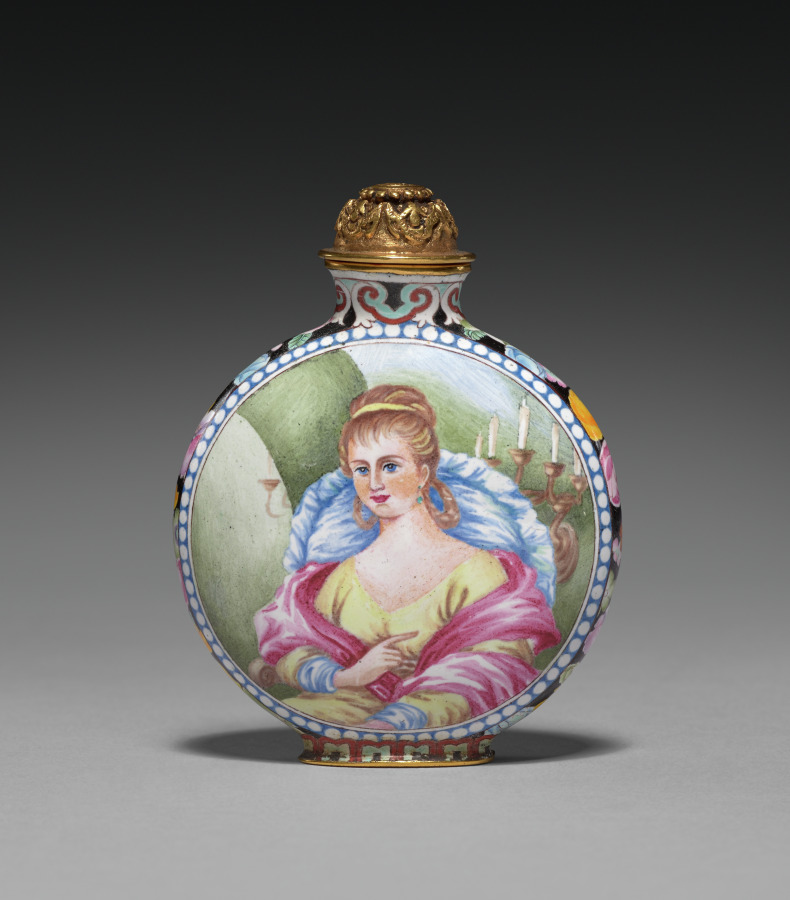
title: Snuff Bottle with European Figures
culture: China, Qing dynasty (1644-1911), Qianlong mark and reign (1736-95)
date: 1736–95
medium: painted enamel on copper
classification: Enamel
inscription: 乾隆年製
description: Snuff bottles were introduced from Europe to China around the 1700s to hold portable snuff or medicine.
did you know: The stopper is decorated with bats, which traditionally symbolize good luck, since both words (蝠 and 福) are both pronounced as fu in Chinese.